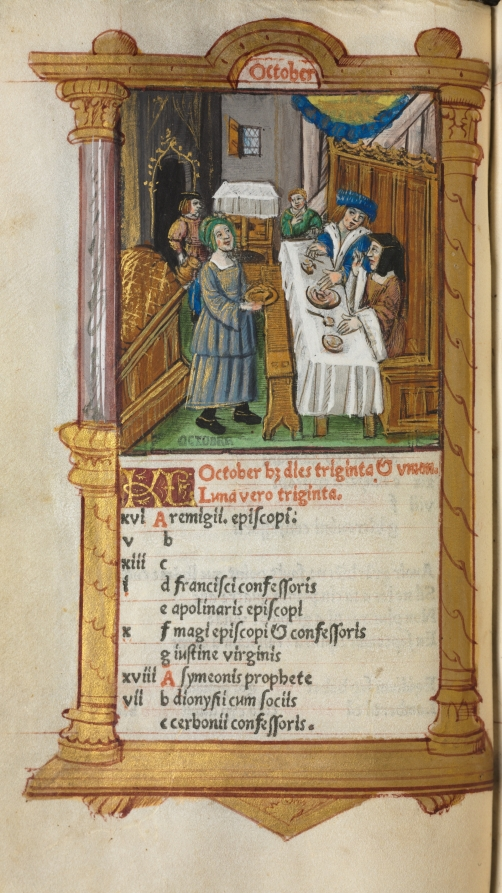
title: Printed Book of Hours (Use of Rome): fol. 11v, October calendar page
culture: France, Paris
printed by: Guillaume Le Rouge (French, Paris, active 1493–1517)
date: 1510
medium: 112 Printed folios on parchment, bound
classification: Bound Volume